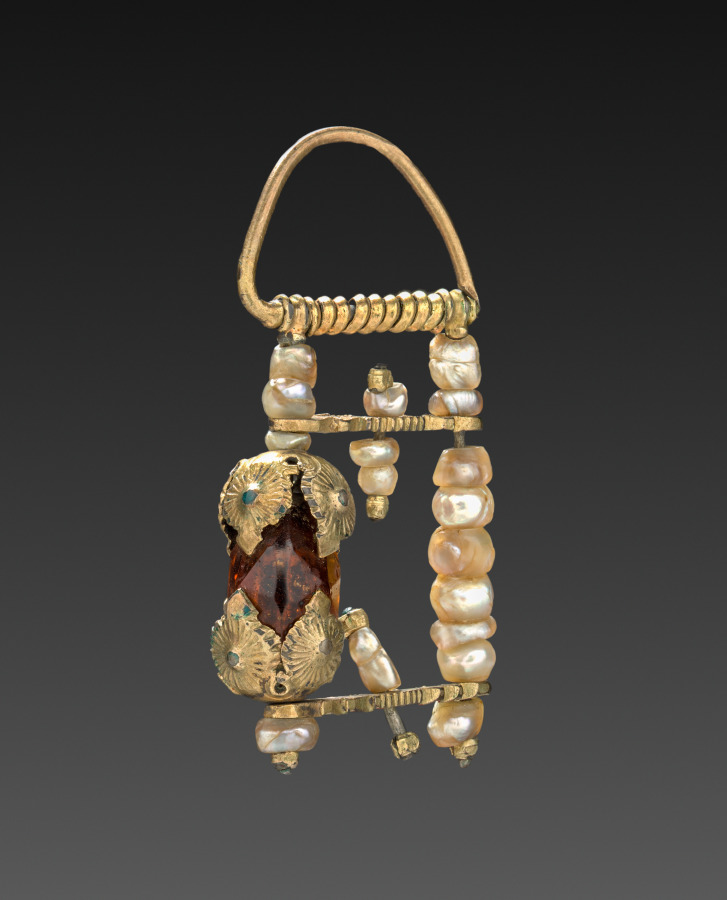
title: Earring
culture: Russia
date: 1800s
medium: silver gilt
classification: Jewelry